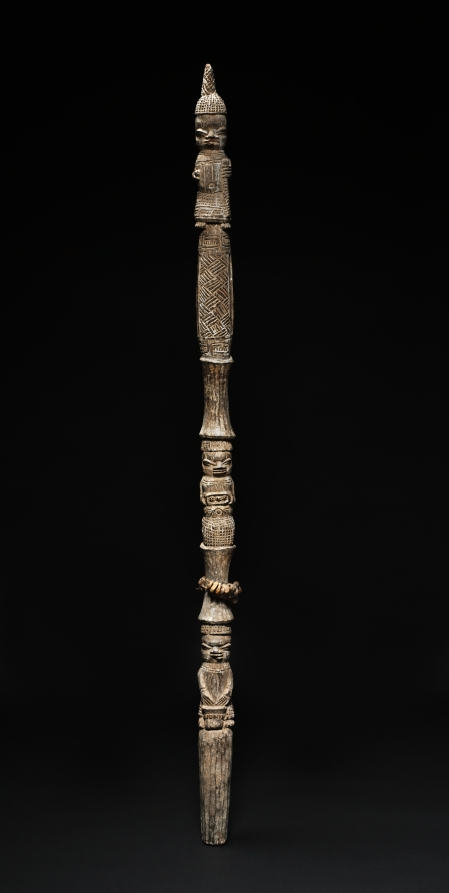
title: Rattle Staff (ukhuhre)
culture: Nigeria, Benin Kingdom, Ẹdo peoples, member(s) of the Igbesanmwan (wood and ivory carvers) guild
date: 1900s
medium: Wood, paint, cowrie shells, and plant fiber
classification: Sculpture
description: Rattle staffs (ukhuhrẹ) are instruments of memory and sound. Though this staff represented a single elite man, it evokes the individuals in his lineage. Inspired by bamboo, it is divided into segments that link three carved men dressed in coral-beaded finery. Benin courtiers still carry these staffs during celebrations and rituals. By banging the staff on the ground, a rattling sound emanates from its open center, where a wooden cylinder rolls freely. The noise alerts ancestral spirits to prayers offered on their behalf. When not in use, they are stored on ancestral altars.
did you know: Rattle staffs (ukhuhrẹ) like this are still used in the Benin Kingdom today.